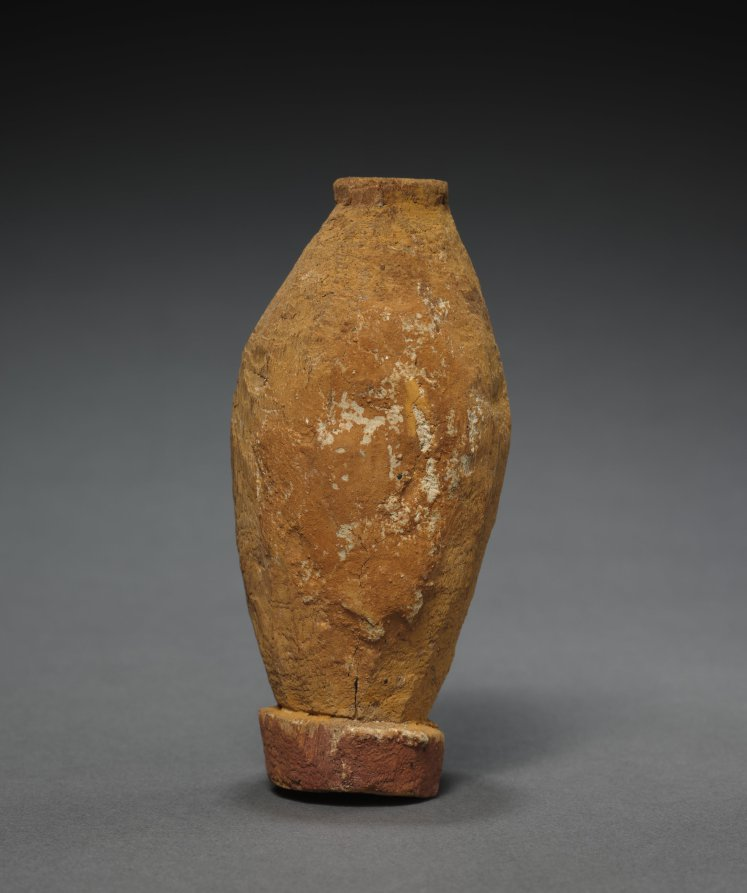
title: Model Storage Vessel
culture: Egypt, Middle Kingdom (2040–1648 BCE), Dynasties 11–12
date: 2000–1900 BCE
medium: painted wood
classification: Funerary Equipment